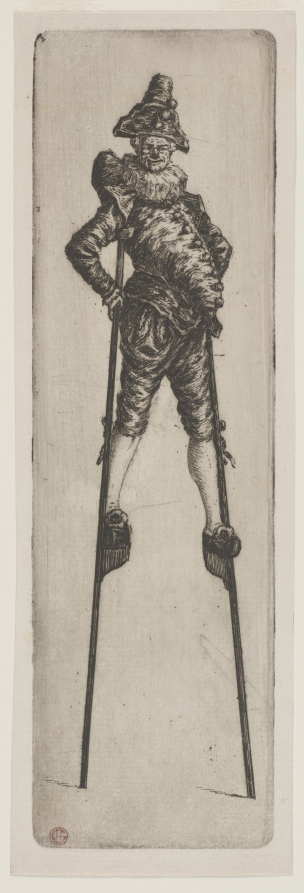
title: Punchinello on Stilts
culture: France, 19th century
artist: Henri Charles Guérard (French, 1846–1897)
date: c. 1888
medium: etching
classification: Print